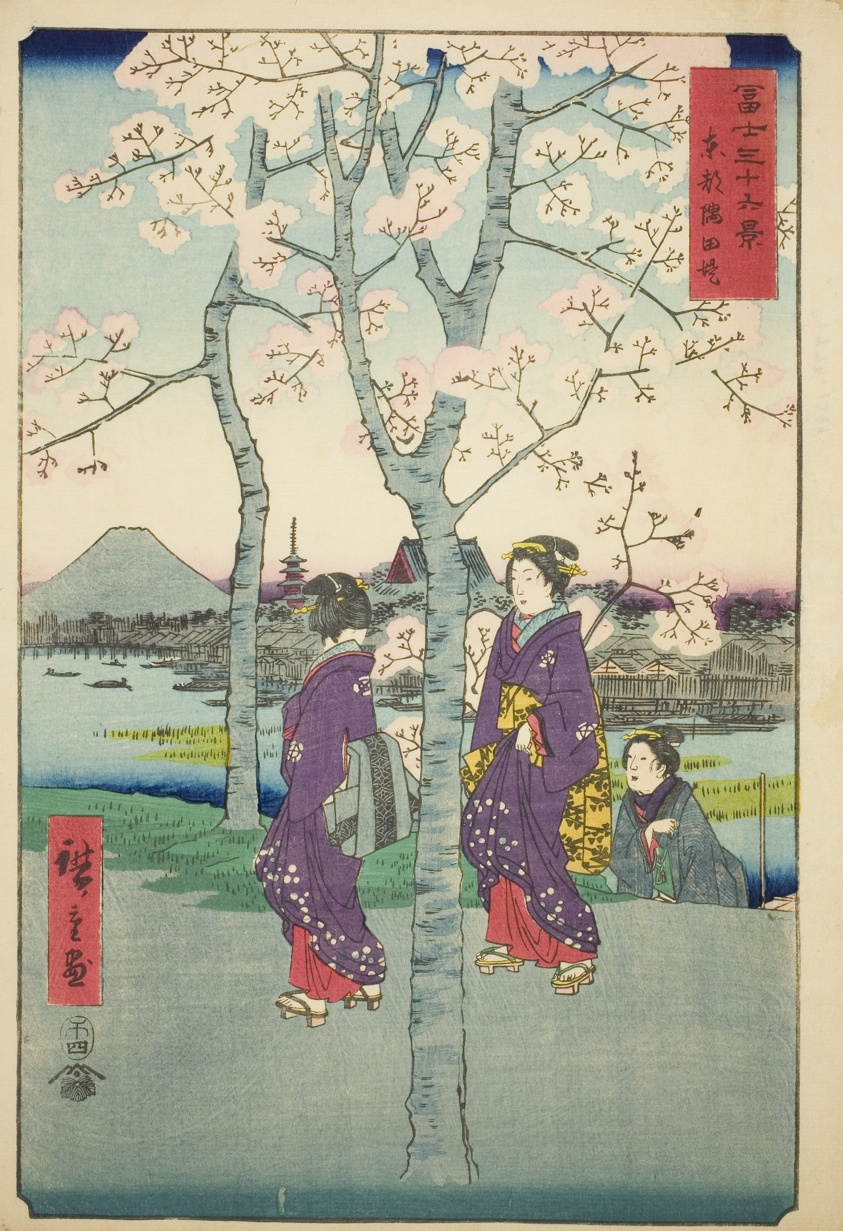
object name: Print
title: The Sumida Embankment in the Eastern Capital (Toto Sumida-zutsumi), from the series "Thirty-six Views of Mount Fuji (Fuji sanjurokkei)"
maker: Utagawa Hiroshige 歌川 広重; Japanese, 1797-1858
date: 1858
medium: Color woodblock print; oban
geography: Japan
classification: print; asian art